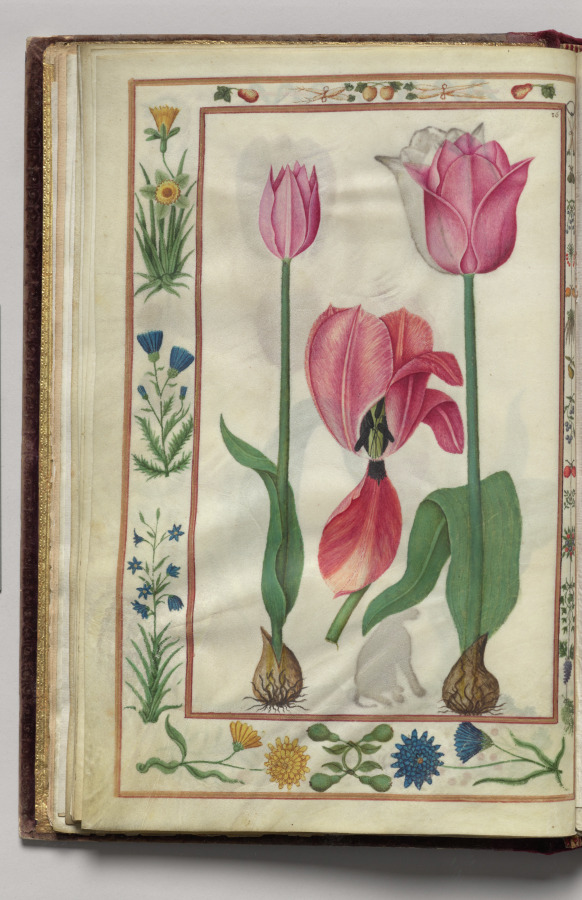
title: Tulips with Floral Border, folio 8 (verso), from Florilegium (A Book of Flower Studies)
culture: France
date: 1608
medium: watercolor, ink, silver, and gold over occasional traces of pencil, on vellum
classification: Bound Volume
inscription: Dated: Poitiers 1608 (on frontispiece) Signed: On frontispiece in black ink, lower right: Van Kuyk Notation on drawing: Frontispiece: in pencil, lower margin: * élève de Van Kessel, peintre flammand (* in pencil also appears in front of Van Kuyk's name).